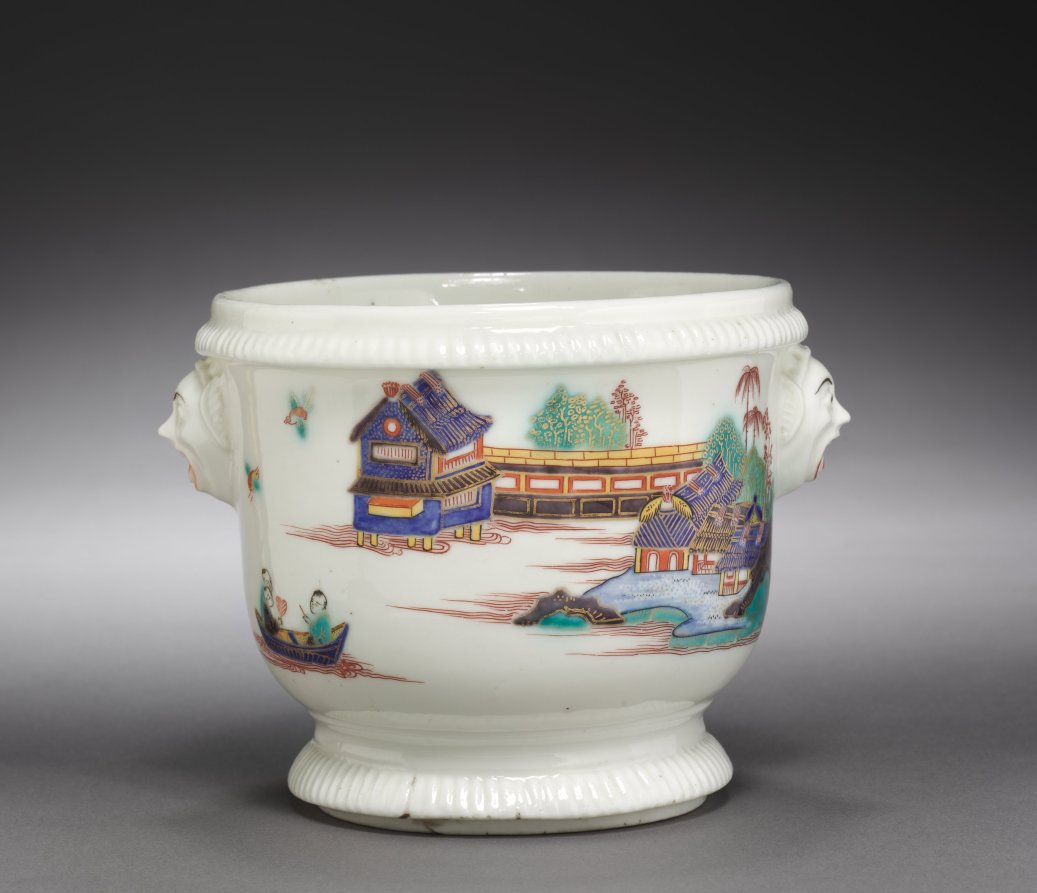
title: Bottle Cooler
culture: France, Saint Cloud, 18th century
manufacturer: Saint Cloud Porcelain Factory (French)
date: c. 1725– 1735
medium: soft-paste porcelain with enamel decoration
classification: Ceramic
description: The form of these cachepots is entirely typical of Saint-Cloud porcelain of about 1725. Their decoration, based upon Chinese porcelains of the so-called "famille-verte" type, is most unusual. Polychromed enamels were not often employed on Saint-Cloud porcelains, and figural scenes are very rare.